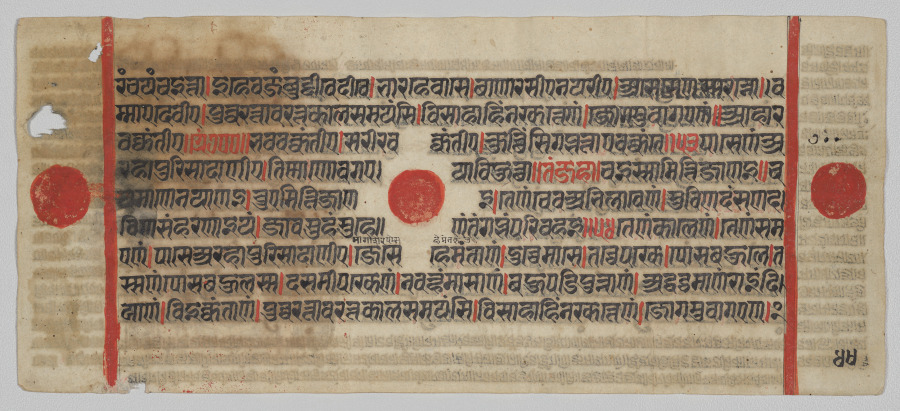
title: Text, Folio 44 (verso), from a Kalpa-sutra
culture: Western India, Gujarat, last quarter of the 15th century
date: c. 1475–1500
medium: Gum tempera, ink, and gold on paper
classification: Painting